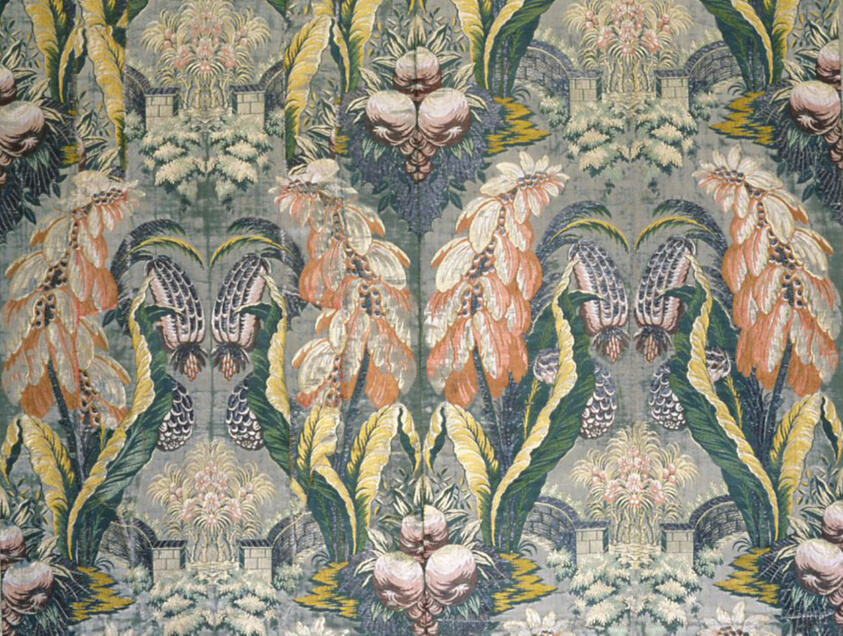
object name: Textile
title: Panel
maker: Design in the style of Courtois (French, active c. 1732–1733); France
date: 1732/33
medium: Silk and silvered-metal-strip-wrapped silk, warp-float faced 7:1 satin weave with supplementary brocading wefts, ground weft floats and secondary binding warps tying some self-patterning ground wefts in a plain interlacing; two loom widths joined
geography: France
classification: textile; weaving